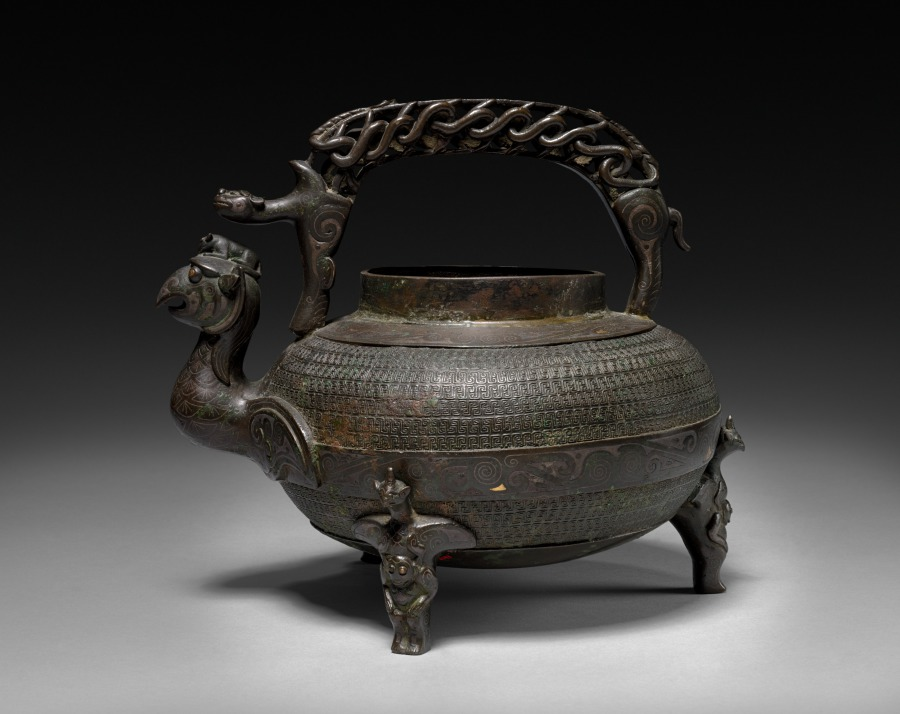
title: Kettle with Handle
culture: China, Qing dynasty (1644-1911) or Republican period (1912-49)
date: 1700s-1800s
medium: bronze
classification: Metalwork